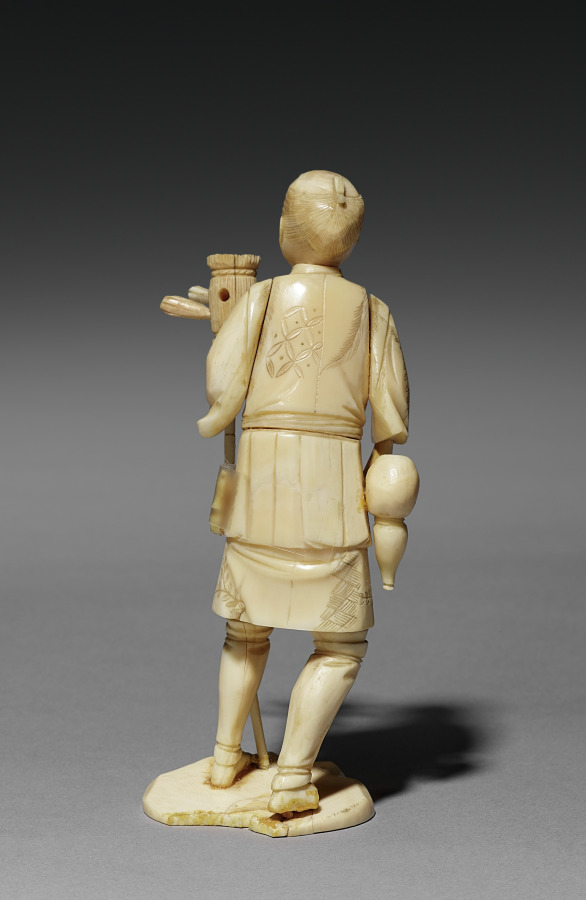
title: Man Holding a Standard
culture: Japan, Meiji period (1868–1912)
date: late 1800s-early 1900s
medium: ivory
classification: Ivory